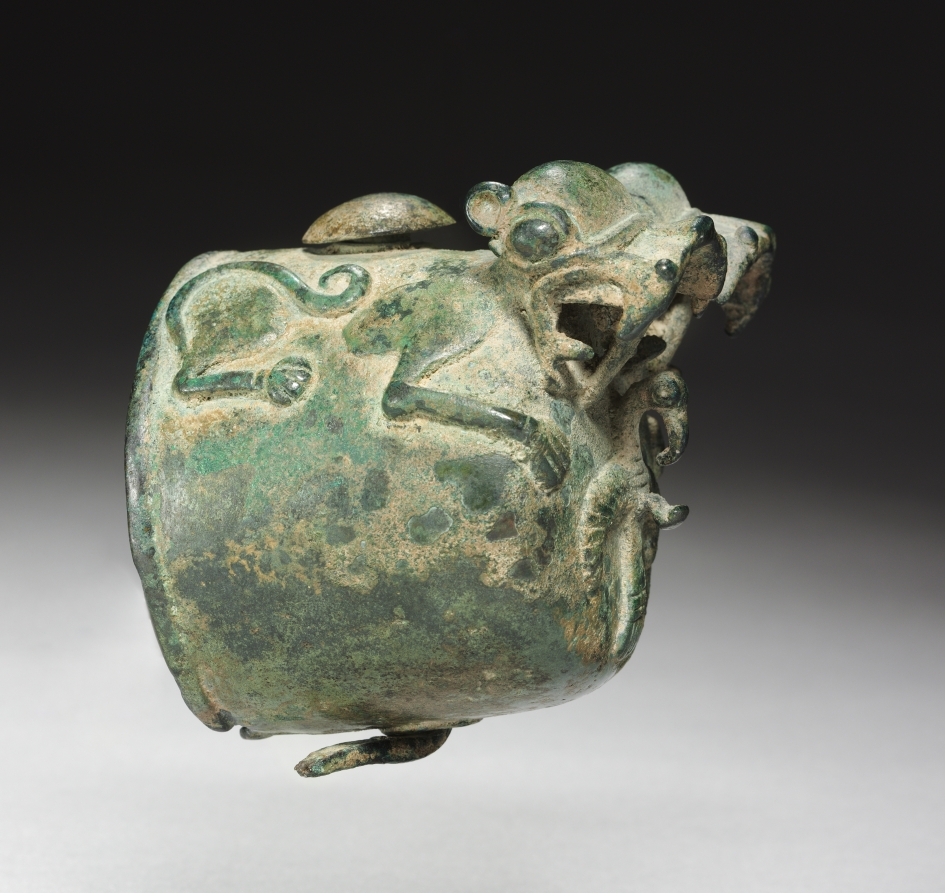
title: Axel Shaft Cup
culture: Iran, Luristan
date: c. 800–700 BCE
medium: bronze, cast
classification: Metalwork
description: Luristan, on Iran's western frontier, and Markik and Amlash in the north were sites of flourishing civilizations. However, since Luristan left little in the way of written records, all that we know about it has been guessed from their works of art. One of the ancient centers of the horse-breeding industry, Luristan is best known for its bronze objects, many of them horse or chariot trappings. Luristan supplied the Assyrian Empire not only with horses but also the hardware associated with them.